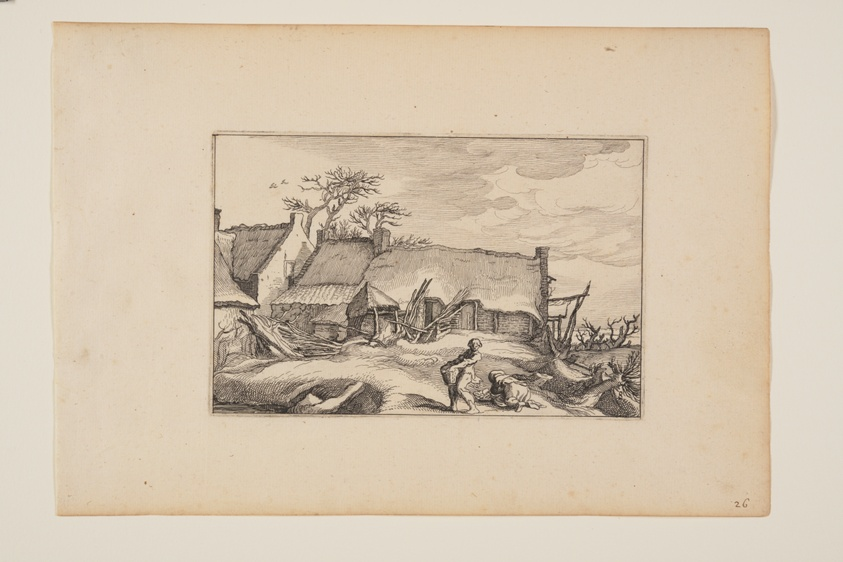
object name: Print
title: A Farmhouse, Man Carrying a Basket in Foreground, from Landscapes (Verscheyden aerdige Lanthuysen...)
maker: Claes Jansz. Visscher (Netherlandish, c. 1550–c. 1612); after Abraham Bloemaert (Dutch, 1566–1651)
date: 1620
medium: Etching on ivory laid paper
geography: Netherlands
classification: print; paper; prints and drawing; etching